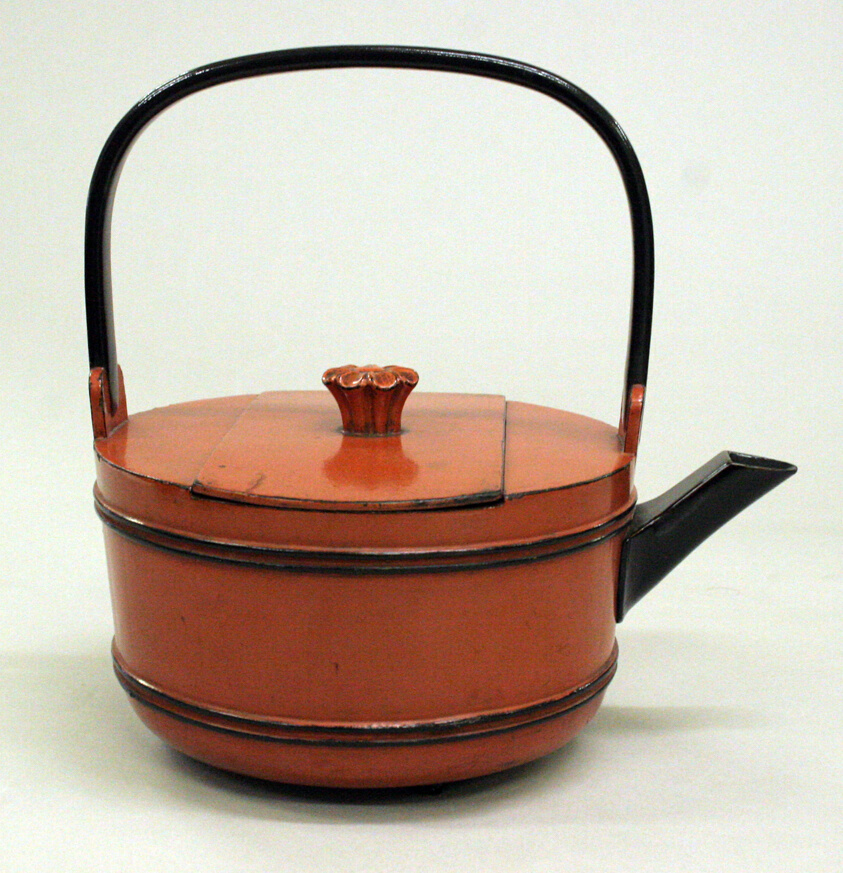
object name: Decorative Arts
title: Hot Water Pot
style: Japanese (culture or style)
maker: Japan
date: 15th century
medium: Lacquer on wood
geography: Japan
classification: lacquerware; asian art; decorative arts